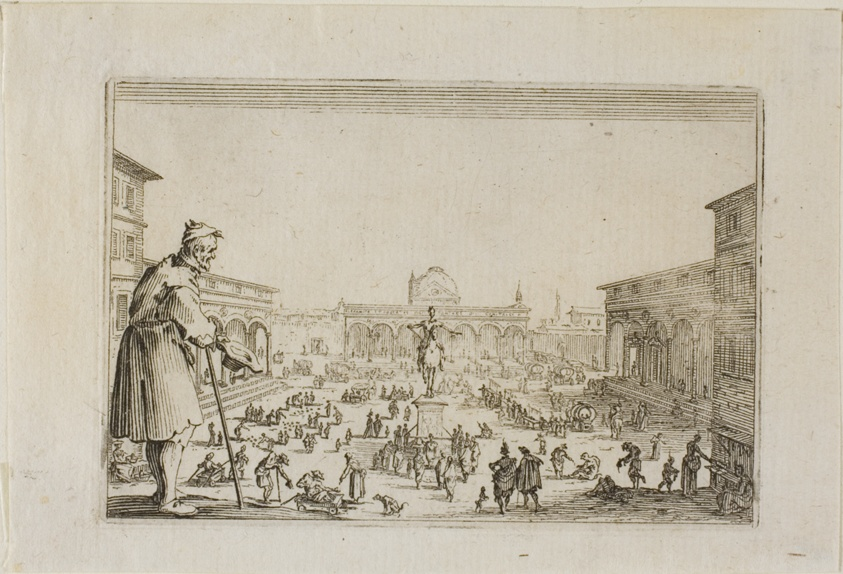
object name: Print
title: The March from the Palace of the Annunciation to Florence, from The Caprices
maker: Jacques Callot (French, 1592-1635)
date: c. 1622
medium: Etching on ivory laid paper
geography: France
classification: etching; print; prints and drawing